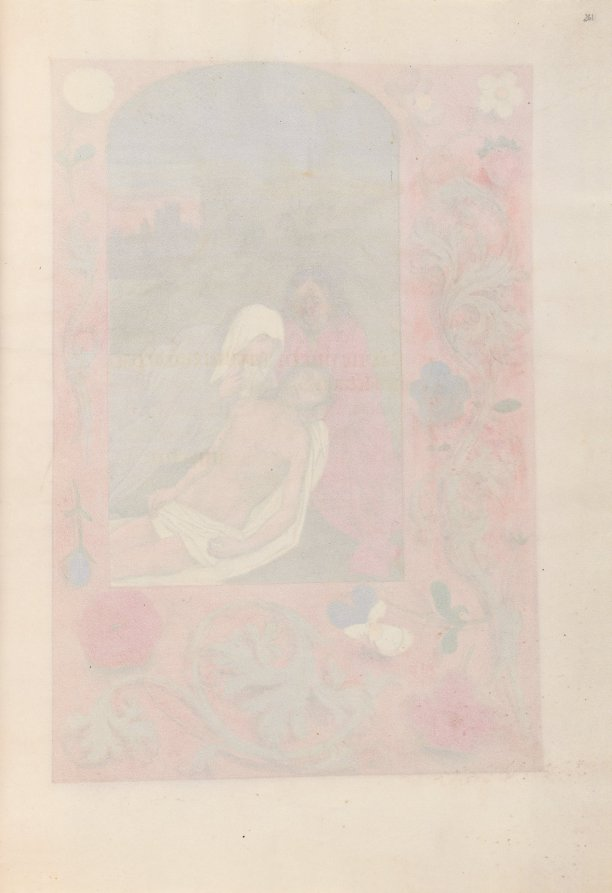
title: Hours of Queen Isabella the Catholic, Queen of Spain: Fol. 261r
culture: Flanders, Ghent and Bruges, late 15th century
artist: Master of the First Prayerbook of Maximillian (Flemish, c. 1444–1519)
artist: and Associates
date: c. 1500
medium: ink, tempera, and gold on vellum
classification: Bound Volume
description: This manuscript was illuminated by a circle of at least five highly organized manuscript painters active in the Flemish cities of Ghent and Bruges. The principal illuminator was Alexander Bening, who painted the majority of the book's miniatures. Manuscripts produced by this circle of artists are renowned for the decoration of their borders, which typically feature a rich variety of realistically-painted flowers, birds, and butterflies. This prayer book, called a book of hours, was intended not for a cleric, but for the private devotions of a lay person-in this case, Isabella the Catholic, Queen of Spain (1451-1504). Isabella's coat of arms embellishes the book's frontispiece. It is unlikely that the book was commissioned by the Queen herself; rather, she probably received it as a diplomatic gift from someone courting her patronage, perhaps Cardinal Francisco Jimenez de Cisneros. A Franciscan friar, Jimenez was dependent upon Isabella for his advancement, first to the post of Queen's confessor in 1492, and then to Archbishop of Toledo in 1495.